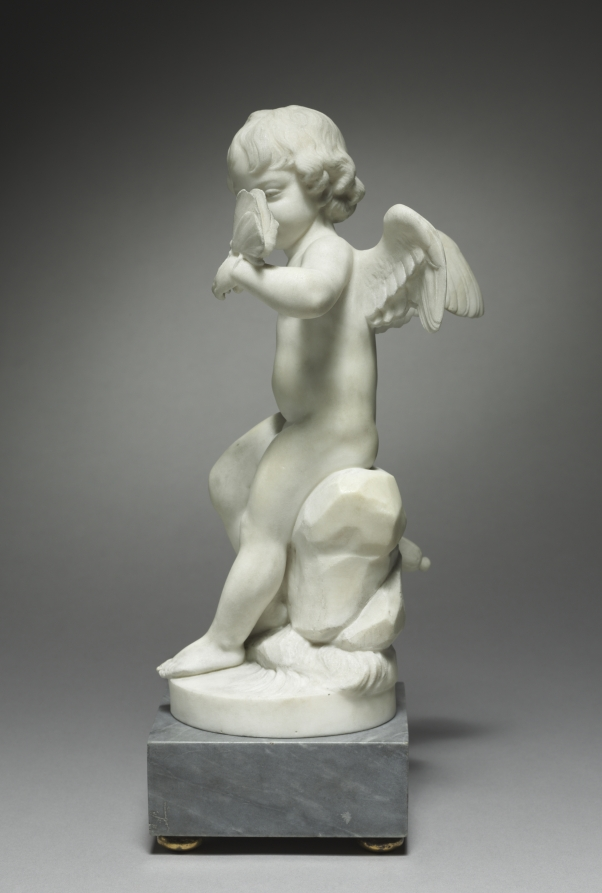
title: Fickle Love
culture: France, 19th century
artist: after Augustin Pajou (French, 1730–1809)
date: 1800s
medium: marble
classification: Sculpture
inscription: Signed Pajou f (fecit) 1787